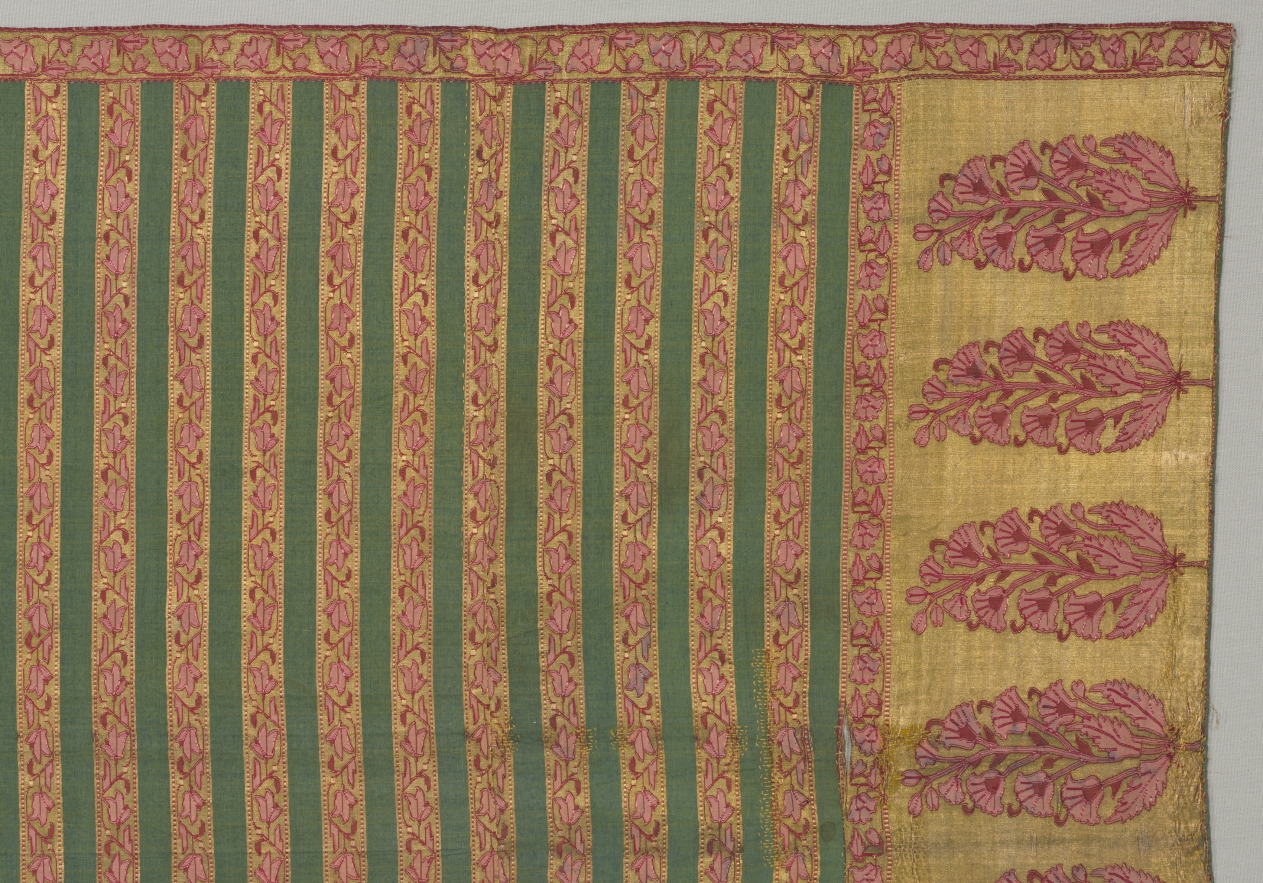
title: Sash with flora and banded field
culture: India, probably Aurangabad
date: 1700s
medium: tapestry weave, double interlocked: silk and gilt-metal thread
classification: Textile